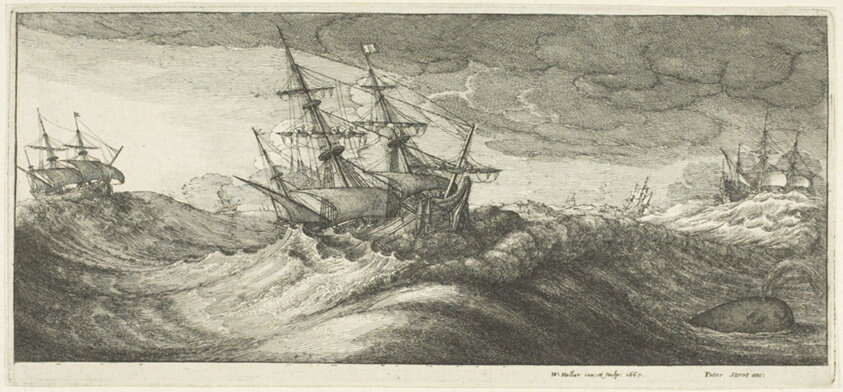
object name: Print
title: Warships and a Spouting Whale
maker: Wenceslaus Hollar (Bohemian, 1607-1677)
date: 1665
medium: Etching on ivory laid paper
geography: Bohemia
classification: etching; print; prints and drawing